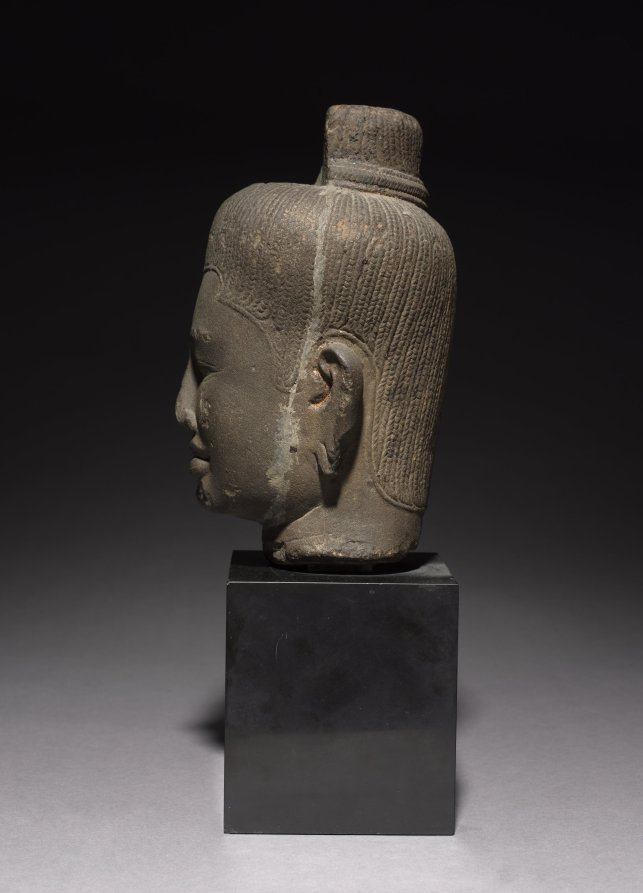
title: Head of a Follower of Shiva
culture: Cambodia, Angkor, 10th century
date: 900s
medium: sandstone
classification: Sculpture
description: Khmer patrons and artists produced works of art that could depict either a deified king or a god who has royal attributes. The Khmer cult of the god-king allowed for such fluidity of interpretation. Presence of a third eye in the forehead and matted locks of hair are attributes both of the Hindu god Shiva and the followers who emulated him in order to get closer to him.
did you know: The third eye on the forehead is a symbol of enlightenment.